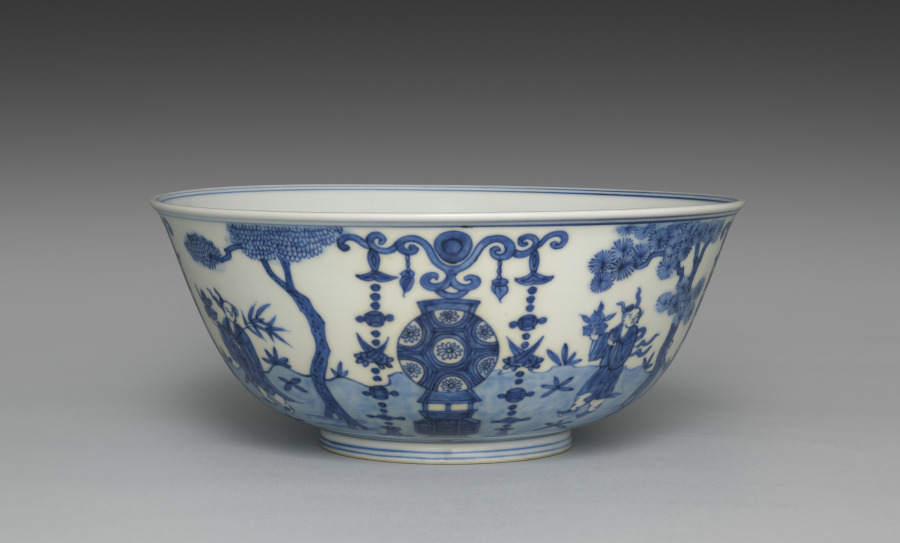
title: Bowl from Nesting Bowls with Daoist Immortals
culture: Japan, Meiji period (1868–1912)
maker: Seifū Yohei III (Japanese, 1851–1914)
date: 1893–1914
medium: Middle bowl from a set of three bowls; porcelain with underglaze blue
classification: Ceramic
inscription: 大日本清風造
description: Yohei III was capable of ink painting–like compositions in underglaze blue, as well as more decorative ones like that on this set of three nesting bowls. Bowls with very similar designs in five colors were produced in the reign of the Wanli emperor (r. 1572–1620 ) during the Ming dynasty, and Yohei must have had direct access to one of these or to a close copy. A scene of Daoist immortals is presented on the bowls. On each one, the ground plane is defined with a blue wash. Four lanterns are evenly spaced around the bowl. Two are flanked with linked-piece metalwork banners of the seven treasures. The alternate altars are adorned with textile banners. In between them are four immortals, each standing beneath a tree with small plants surrounding his feet. Two of the immortals hold fruit on a tray. Another carries an elixir-filled ewer and a willow branch. The fourth holds a swastika (manji), here an auspicious symbol, and a flower. Curiously, the inscription inside each footring reads “Made by Seifu of Great Japan,” in emulation of the dynasty and reign inscriptions that appear on Chinese ceramics; but one can also see through the translucent glaze another inscription, “Seifu Yohei,” written in large characters within a double band of blue on the largest bowl.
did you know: In the bottom of each bowl is a scene of two robed immortals who appear to stand on a precipice in a mountainous landscape high in the clouds, with celestial orbs over their heads.